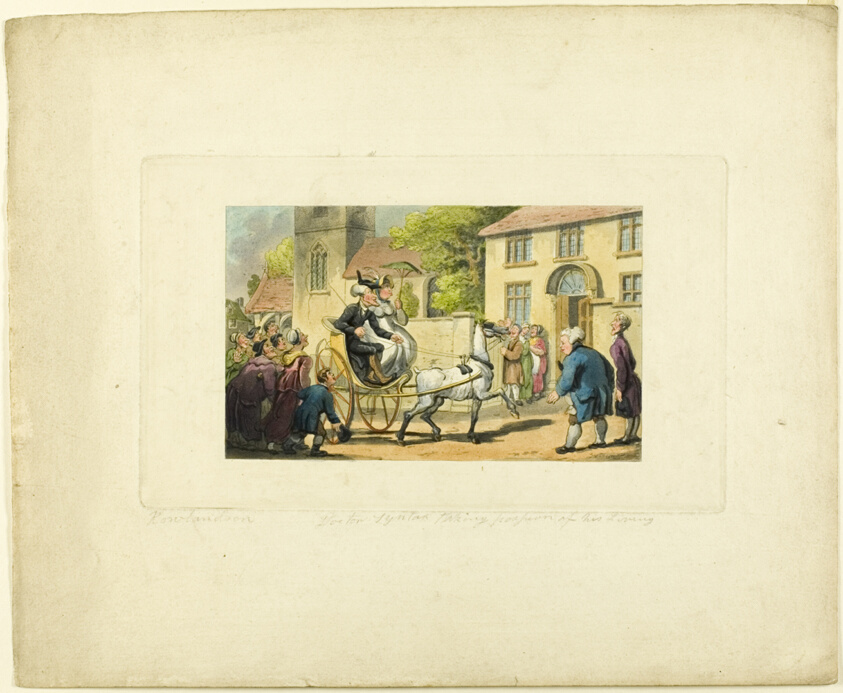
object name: Print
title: Doctor Syntax Taking Possession of his Living, from The Tour of Doctor Syntax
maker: Thomas Rowlandson (English, 1756-1827); published by Rudolph Ackermann (English, 1764-1834)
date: c. 1812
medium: Hand-colored etching and acquaint on ivory wove paper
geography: England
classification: etching; print; prints and drawing